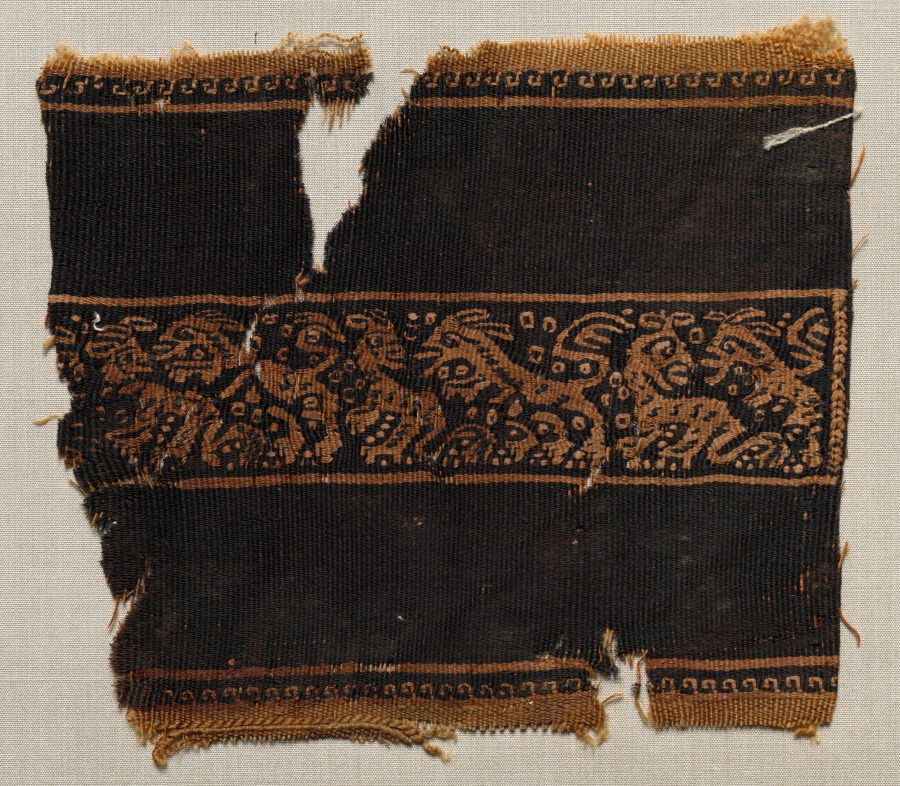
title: Fragment, with Part of a Clavus, from a Tunic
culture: Egypt, Early Islamic period, 8th - 9th century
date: 700s - 800s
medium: tabby weave, inwoven tapestry ornament; wool and linen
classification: Textile